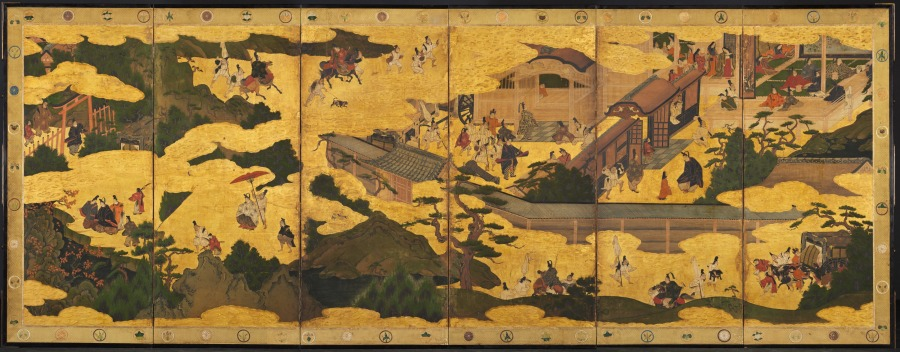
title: Scenes from the Tales of Ise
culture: Japan, Edo period (1615–1868)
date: mid-1600s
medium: Pair of six-panel folding screens; ink, color, and gold on gilded paper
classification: Painting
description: While the 11th century Tale of Genji is universally regarded as Japan's literary masterpiece, the source for visual imagery in Japanese culture is rivaled by another literary classic, the Tales of Ise. A 10th century anthology of poems interspersed with commentary, the Ise portrays the emotional and geographical journey of a courtier from the capital (Kyoto) into the countryside and beyond. The poems describe features of the natural, untamed terrain, linking them to the rather melancholy state of the traveler. Since the Tales of Ise was—and remains today—well read by educated Japanese, a person viewing these folding screens would immediately recognize its subject, organized as a series of discrete scenes read from right to left. Neither a signature nor a seal identifies the artist, but judging from related paintings, the work can be ascribed to an artist working in Kyoto during the first quarter of the 17th century in the manner of the painter Iwasa Matabei (1578–1650). This type of historical narrative composition became quite popular around 1600 among patrons favoring a distinctly Japanese style of painting which employed rich mineral pigments and a liberal use of gold.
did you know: Scenes appear amid golden clouds augmented by raised designs formed of a pigment made from crushed shells (gofun). The technique is called moriage, literally “mounding” the pigment.